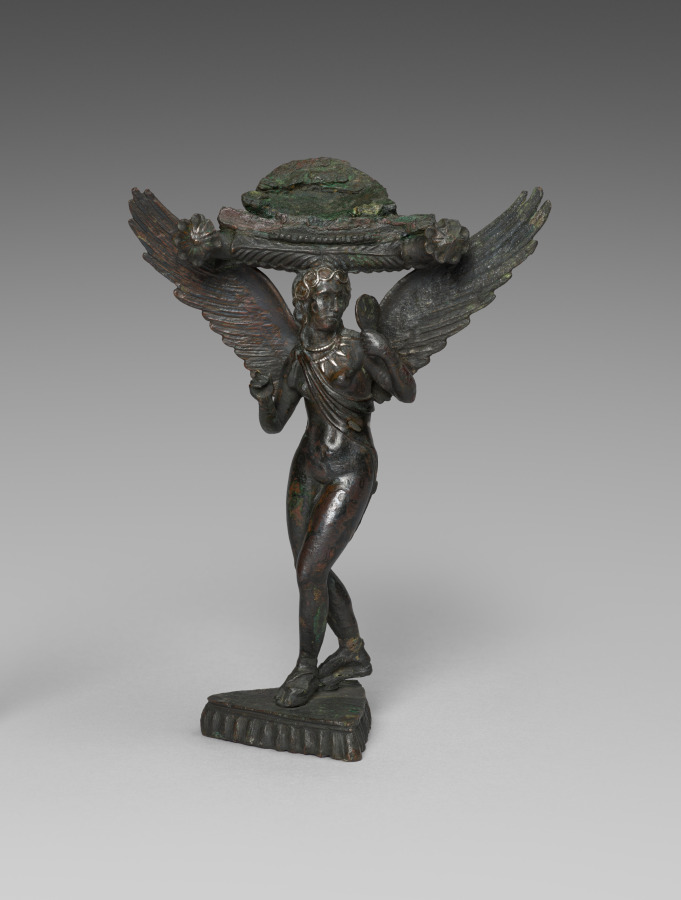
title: Patera Support: Lasa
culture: Etruscan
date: 300–175 BCE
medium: bronze with silver inlays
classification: Sculpture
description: Standing on a triangular base, this winged female figure twists her body while admiring herself in the small mirror held in her left hand. Nearly nude, she wears sandals as well as a leopard or panther skin and jewelry inlaid with silver. Above her head and wings, a small portion of a patera, or shallow offering dish, survives. Inscriptions identify similar winged female figures elsewhere in Etruscan art as Lasas, often together with Turan (an Etruscan goddess analogous to the Greek Aphrodite).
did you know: This elaborate figure served as a handle or support for a patera, a shallow dish.